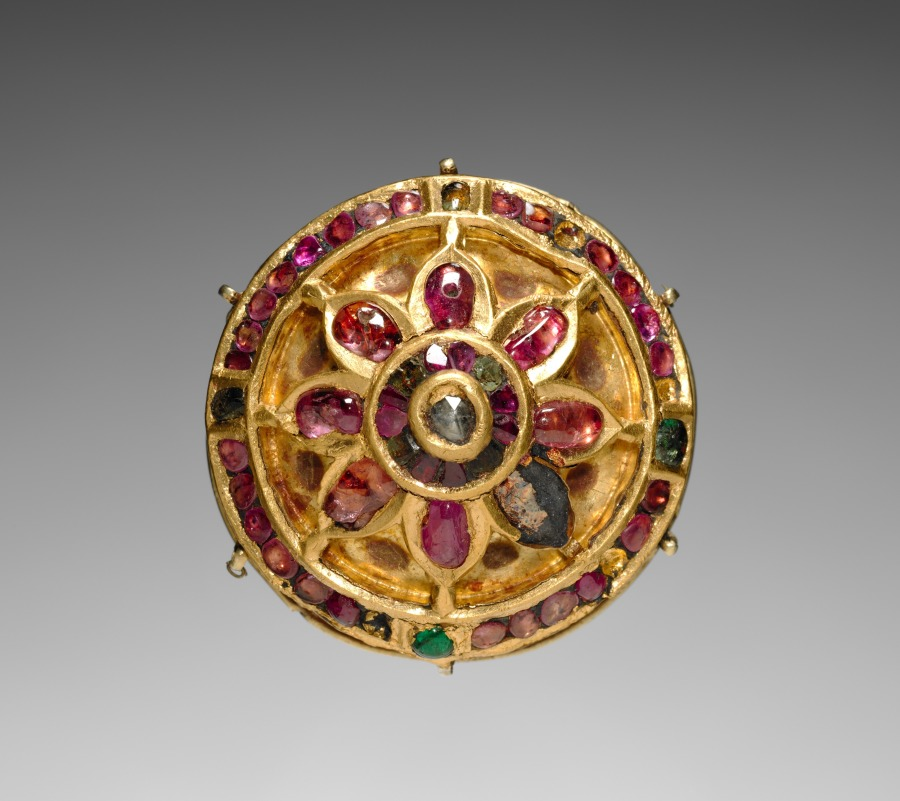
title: Ear Plug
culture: India, Bengal (?)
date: 1800s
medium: gold with emeralds and rubies, and a topaz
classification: Jewelry